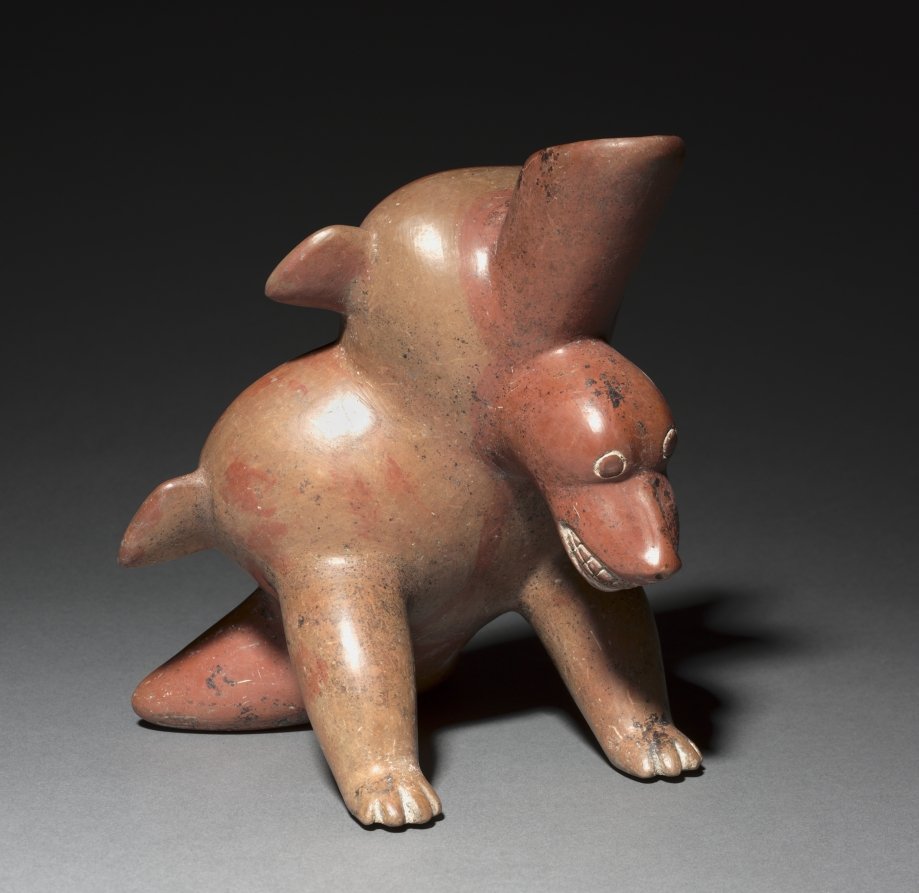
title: Recliner-shaped Vessel (Reclinatorio)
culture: West Mexico, Colima state, Comala style, Formative period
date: 200 BCE–300 CE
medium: ceramic and slip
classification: Ceramic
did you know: This vessel represents a major type of Colima pottery.